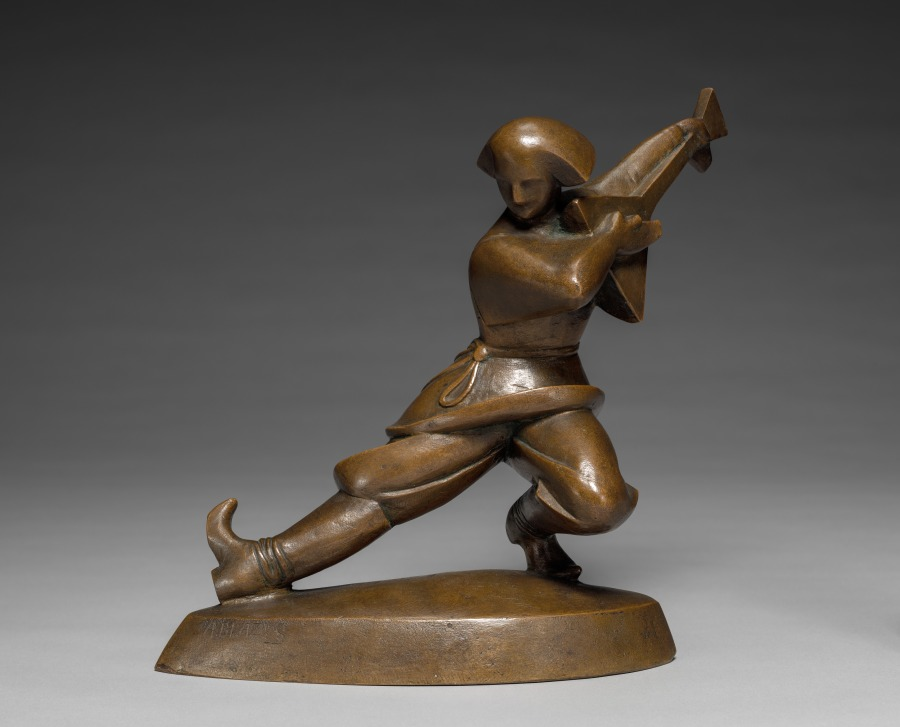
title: Balalaika Player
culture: America, Ohio, Cleveland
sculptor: Alexander Blazys (American, born Russian Empire [now Lithuania], 1894–1963)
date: 1925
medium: bronze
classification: Sculpture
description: A Lithuanian immigrant, Blazys introduced modernist sculpture to Cleveland upon his arrival in 1925. These figures merge rhythmic movement inspired by music with faceted, geometric planes derived from Cubism.